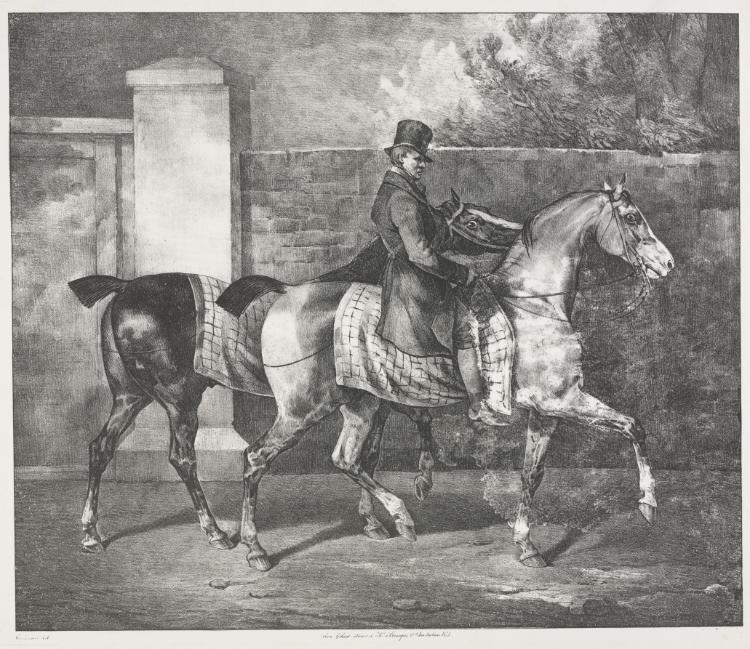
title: Two Horses Exercised by a Jockey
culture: France, 19th century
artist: Théodore Géricault (French, 1791–1824)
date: 1822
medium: lithograph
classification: Print